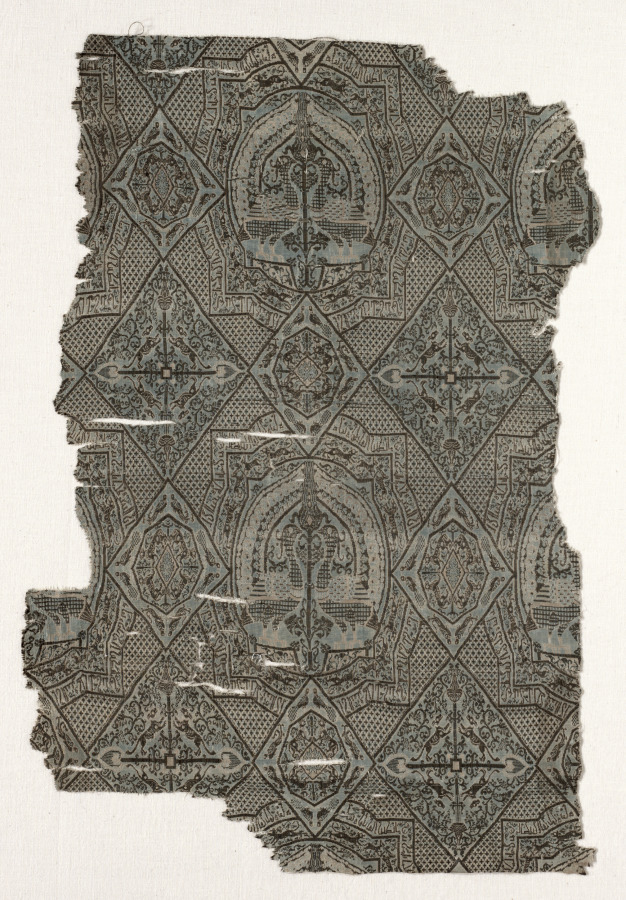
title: Fragment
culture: Iran or Iraq, in the style of the Seljuq period (1037–1194)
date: before 1968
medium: Silk: lampas weave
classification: Textile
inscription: fa-idha al-na'imu wa-kullu ma yulha bihi/ yawm (an in superscript) yasiru ilá bilá wa-nafadi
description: Geometric medallions aligned on a diaper ground are enclosed in a grid of large and small lozenges. Medallions contain confronting peacocks flanking a Tree of Life. The double border has an inner frieze of running animals and an outer band of Kufic inscription. The larger diamonds contain four-directional palmette trees and two opposed pairs of rampant animals. The smaller diamonds have pairs of peacocks in each corner framing an octagon, which contains two opposed pairs of animals flanking a central lozenge. Floral vines and ornaments fill the interspaces of large and small diamonds.